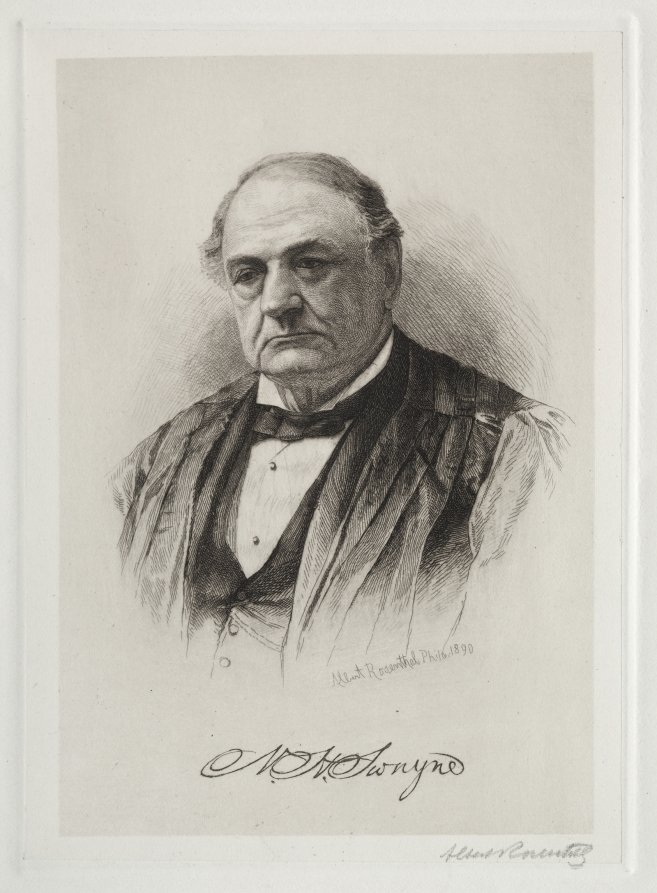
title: W. H. Swayne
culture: America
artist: Albert Rosenthal (American, 1863–1939)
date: 1890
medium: etching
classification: Print